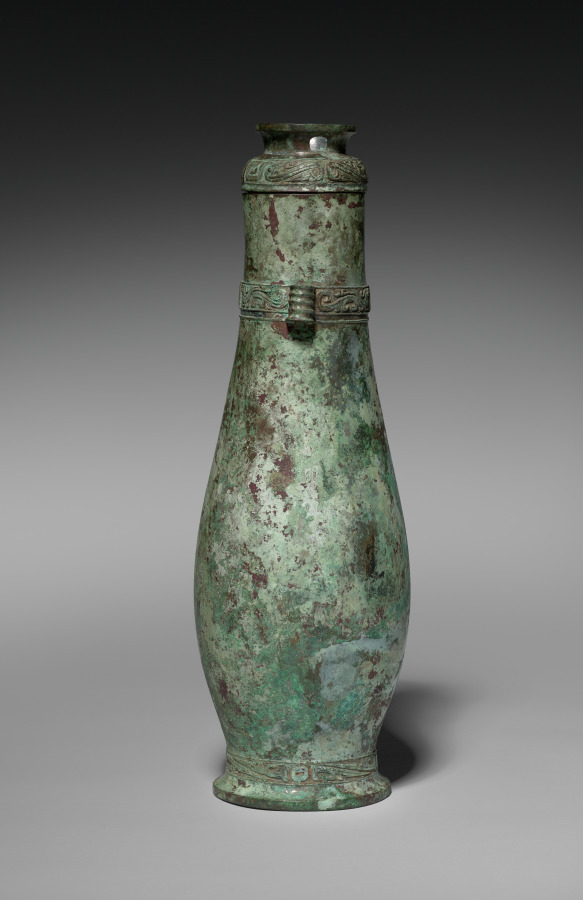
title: Wine Vessel (Hu)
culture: China, Western Zhou dynasty (c. 1046–771 BCE)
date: c. 1000–900 BCE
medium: bronze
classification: Metalwork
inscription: inscription inside top (cup): 事从作壺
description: This tall, slender bronze wine vessel, called a hu, has three bands of ornamentation: one above the foot, one around the neck, and one on the cover. Stylized birds or phoenixes are in the band around the neck, while the band on the cover and foot feature geometric dragons. The dragon and the phoenix may represent yin and yang and would be equally appropriate on a bronze of either secular or religious purposes. When inverted, the cover forms a cup. It likely held liquids like wine at festive banquets or religious ceremonies. The cylindrical "handles" at the neck band suggest that the vessel was carried by a cord.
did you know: This vessel was cast by the cire perdue, or lost wax, process.